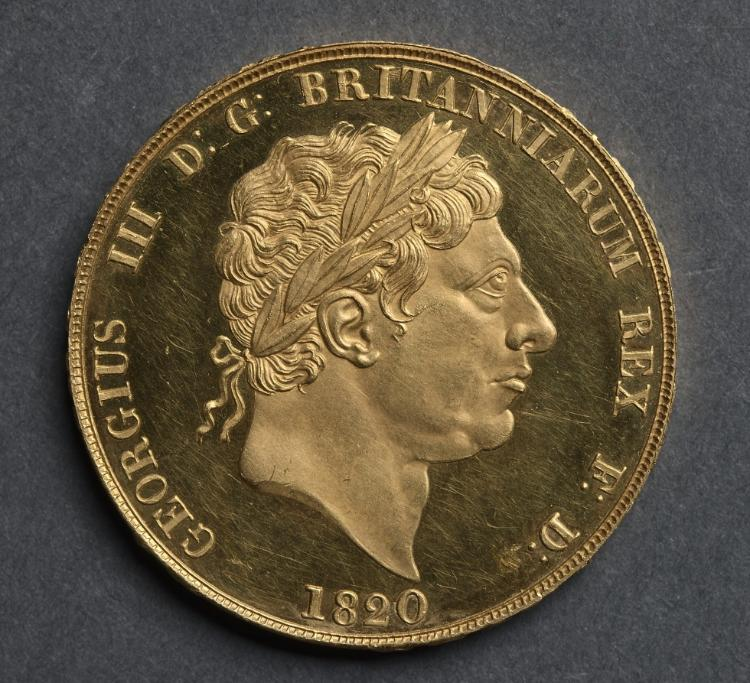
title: Two Pound Piece: George III (obverse)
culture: England, George III, 1760-1820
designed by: Benedetto Pistrucci (Italian, 1784–1855)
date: 1820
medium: gold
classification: Coins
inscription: GEORGIUS III . D: G: BRITANNIARUM REX F: D: 1820.